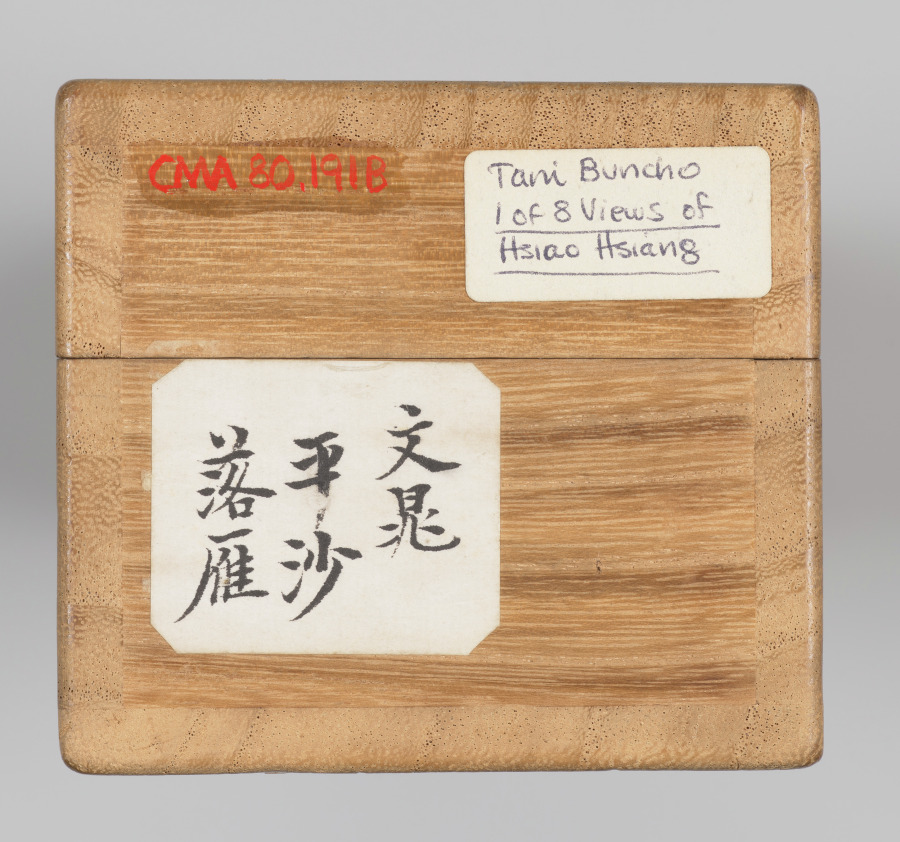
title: Wild Geese Descending on a Sandbar, from Eight Views of Xiao-Xiang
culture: Japan, Edo period (1615–1868)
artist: Tani Bunchō (Japanese, 1763–1841)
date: 1788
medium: album leaf remounted as a hanging scroll; ink and color on paper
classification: Painting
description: This painting was part of a set of album leaves representing the Eight Views of Xiao-Xiang, a theme originating in Chinese poetry and painting that spread to both Korea and Japan. Southern China’s Xiao-Xiang area, where the mist-covered banks of the Xiang River created a complex landscape shifting like the moods and minds of people, captured the imaginations of generations of painters and calligraphers. Inscriptions on these works suggest that they were possibly ordered by newly prominent Japanese Confucian scholars.